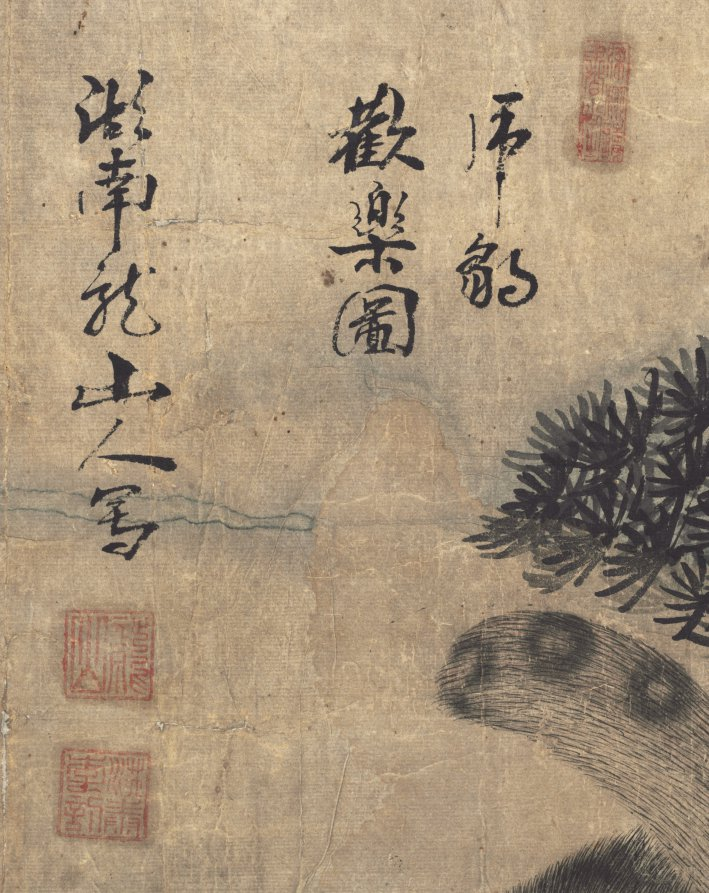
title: Tigers and Leopard Frolicking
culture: Korea, Joseon dynasty (1392–1910)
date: 1700s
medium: Hanging scroll; ink on paper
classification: Painting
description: This monochrome composition depicts a tiger and her young playing at stalking one another in a stand of pine. Tigers, considered messengers of mountain spirits, and are often paired with leopards, mistakenly thought to be baby tigers. The signature written at the upper left of the painting reads "The mountain recluse of Honam," possibly referring to a painter from Jeolla province in Korea.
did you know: Korean artists during the Joseon dynasty (1392–1910) often described leopards as baby tigers, explaining why in this painting tigers and leopards are shown together as a family.